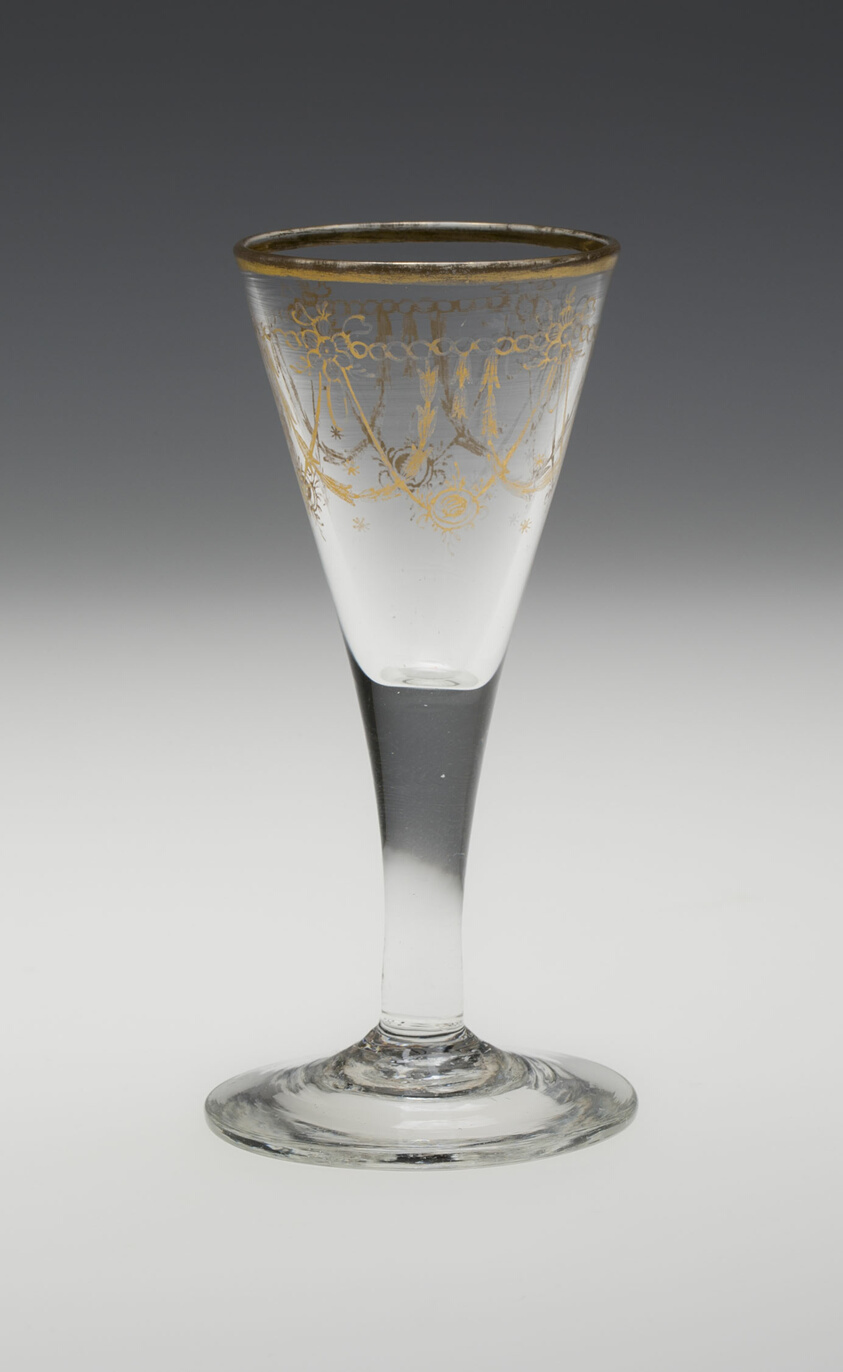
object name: Glass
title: Wine Glass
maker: England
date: c. 1765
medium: Glass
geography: England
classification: drinking vessel; european decorative arts; glass